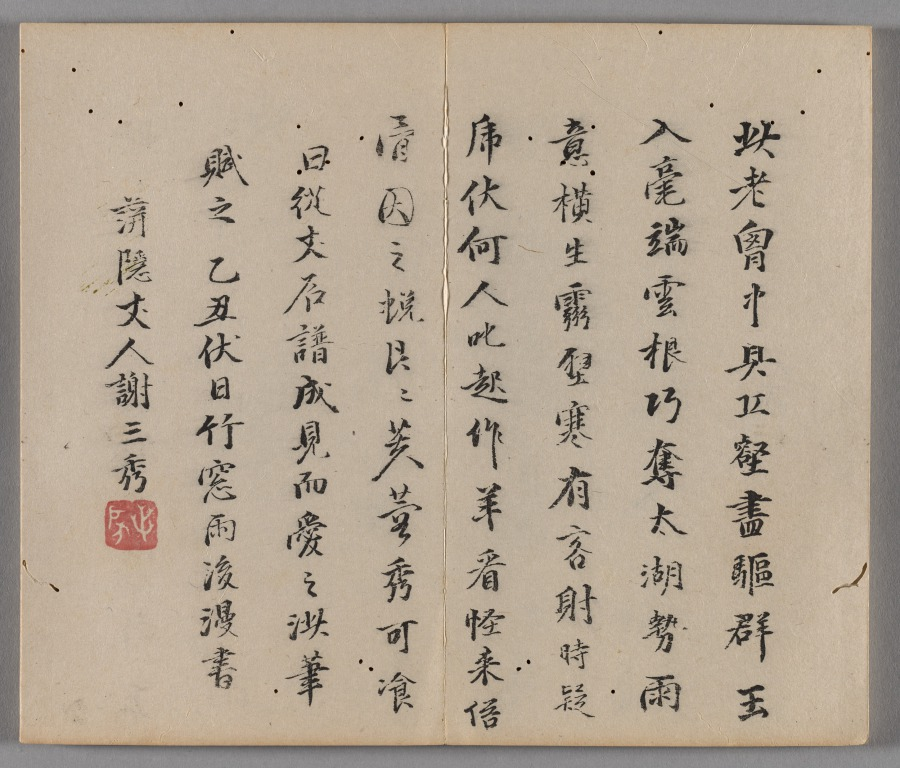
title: Ten Bamboo Studio Painting and Calligraphy Handbook (Shizhuzhai shuhua pu): Rocks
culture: China, Qing dynasty (1644-1911)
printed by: Hu Zhengyan (Chinese, c. 1584–1674)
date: 1633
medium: Woodblock-printed book; ink and colors on paper; first edition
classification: Print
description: Color printing reached a level of perfection in the early 1600s, as seen in this Ten Bamboo Studio Collection of Calligraphy and Painting and the Mustard Seed Garden Manual of Painting (printed 1679 and 1701). The painterly quality, precision in registering (aligning) the woodblocks, and harmonious colors made them the most successful color print editions in Chinese history. Both editions were printed and compiled in Nanjing, spread nationwide, and had a great impact on the arts in Japan and Korea.